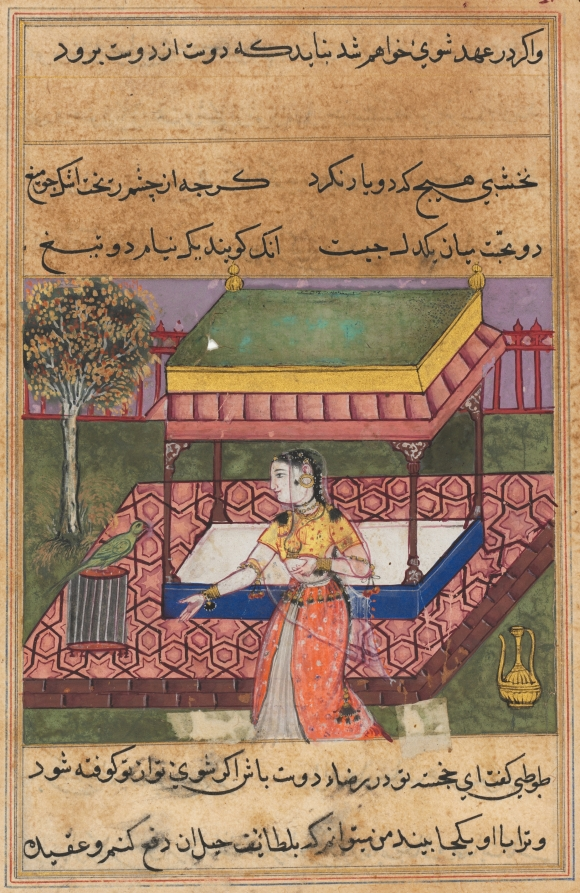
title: The parrot addresses Khujasta at the beginning of the fortieth night, from a Tuti-nama (Tales of a Parrot)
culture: Mughal India, court of Akbar (reigned 1556–1605)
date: c. 1560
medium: gum tempera, ink, and gold on paper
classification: Painting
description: As Khujasta prepares to leave to spend the night with her lover, she is stopped by Tuti the parrot. Tuti begins to tell her the story of a merchant’s wife, named Shahr-Arai, who tricked her husband in order to carry out an affair. The story is set in Nishapur, a city in northeast Iran.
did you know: A highly corrosive copper green pigment, called verdigris, has darkened and damaged the paper.